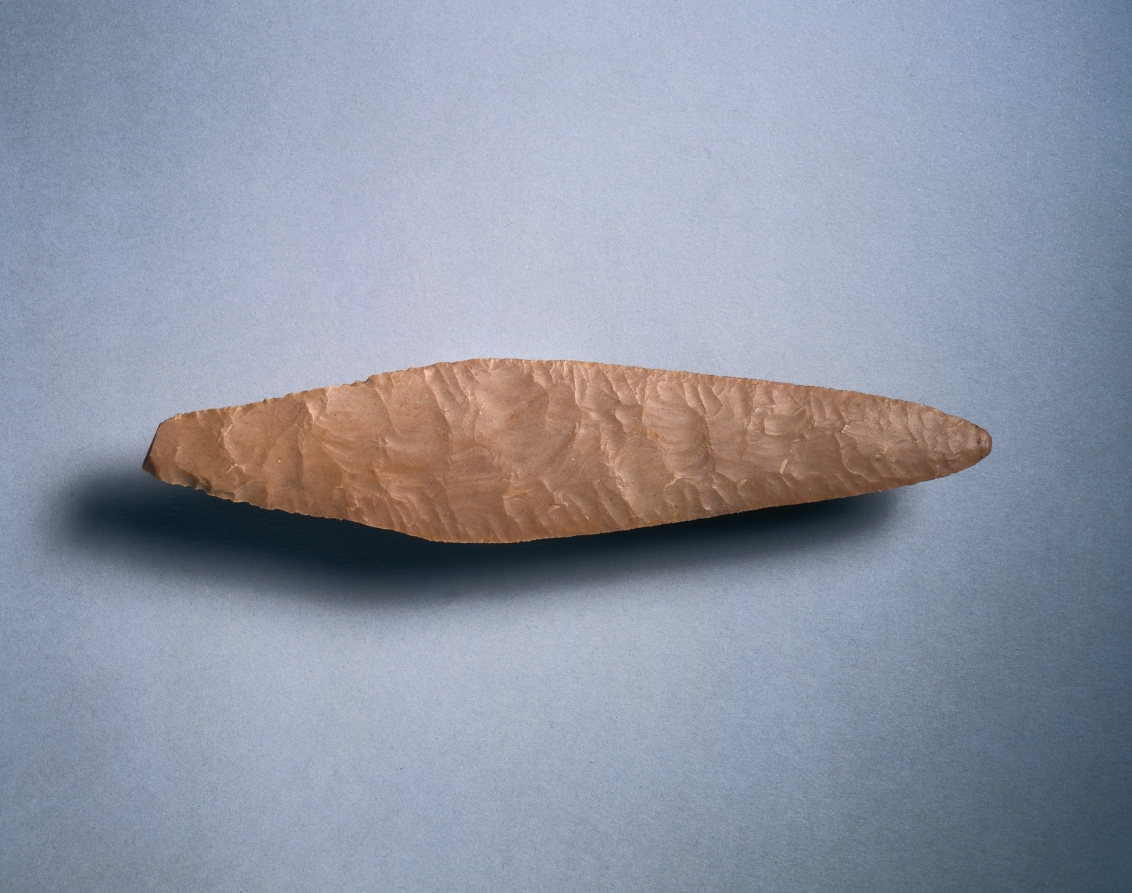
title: Rhomboidal Knife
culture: Egypt, Predynastic (5000–2950 BCE), Naqada Ia–b (3900–3500 BCE)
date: 4500–3500 BCE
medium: light brown flint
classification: Implements